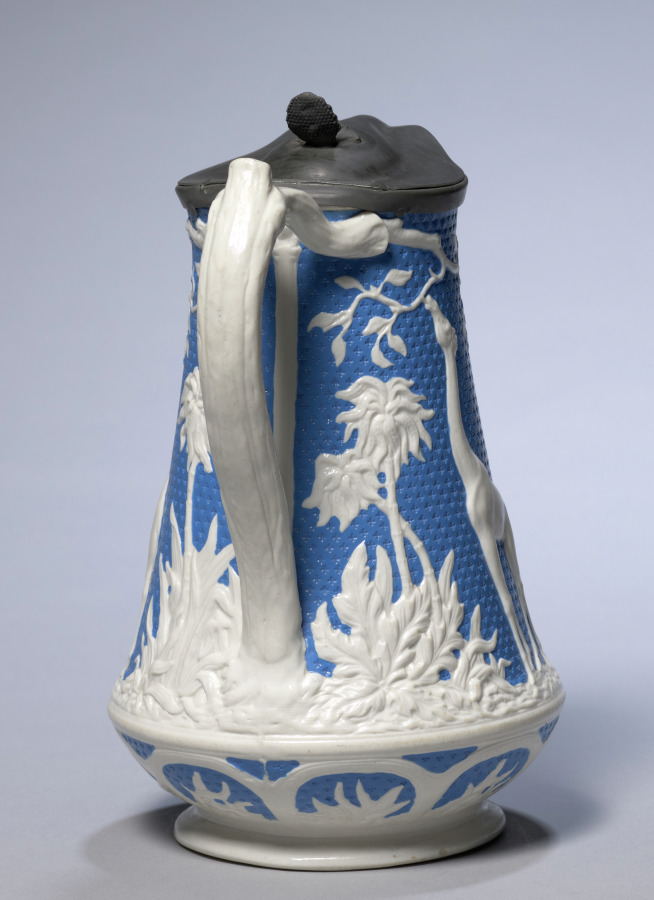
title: Jug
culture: England, Staffordshire, Burslem, 19th century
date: 1850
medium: parian ware with metal rim and cover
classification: Ceramic